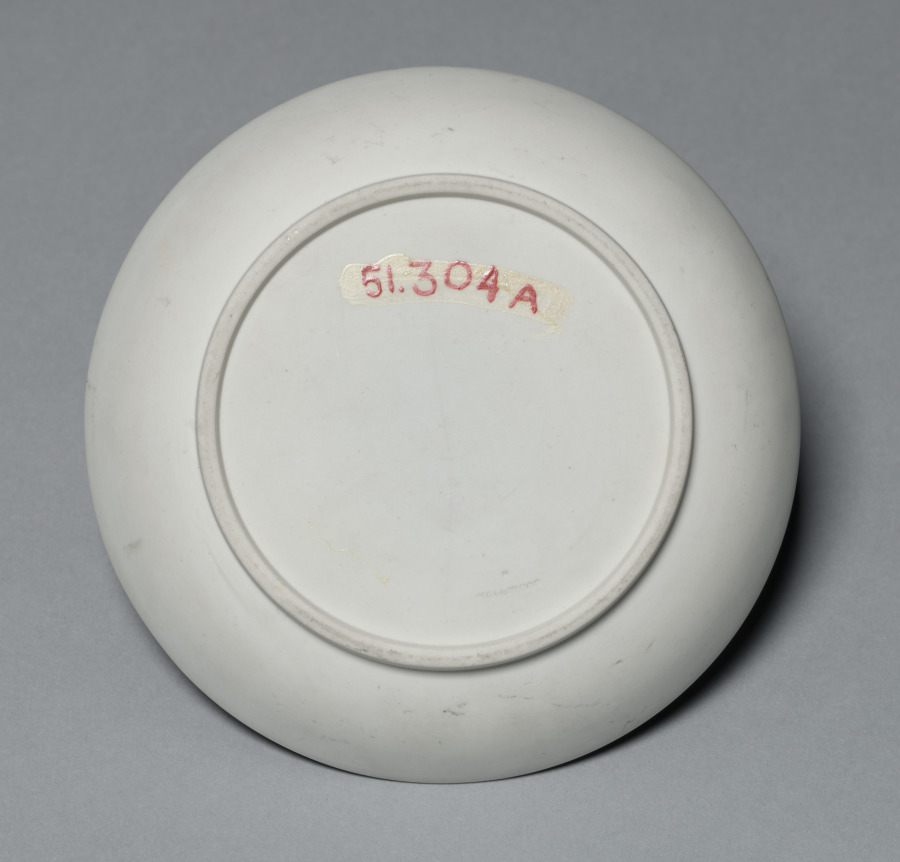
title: Saucer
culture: England, Staffordshire, 18th century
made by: Wedgwood Factory (British)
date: c. 1784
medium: jasper ware with relief decoration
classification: Ceramic